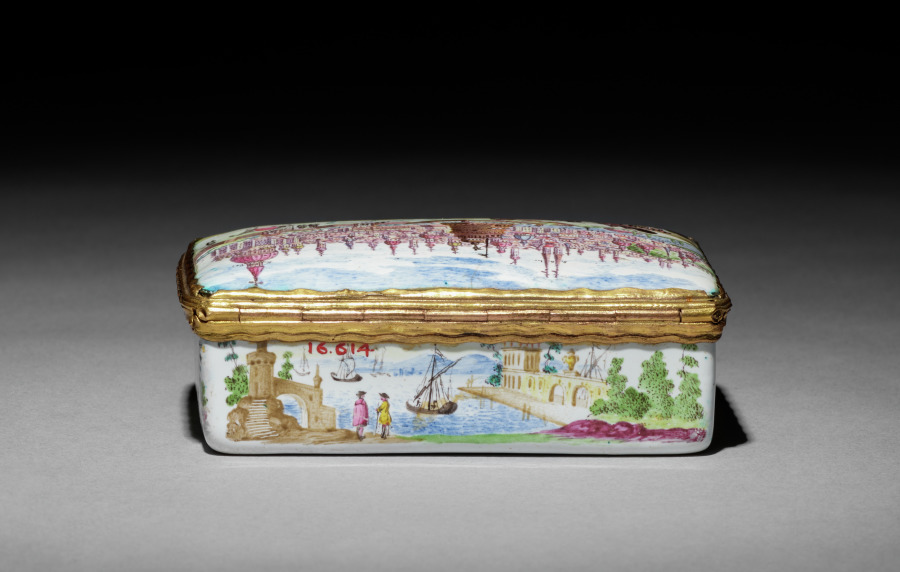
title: Snuff Box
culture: Austria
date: c. 1750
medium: enamel on copper with metal mounts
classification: Miscellaneous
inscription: on top there are a number of inscriptions in black: "Roma," "Trevere R," "C:ST: Ang" (for Castello San Angelo), "S: Pe:" (for San Pietro), "S.G.L." (probably for San Giovanni Laterano). on interior of lid: "WIENNE."